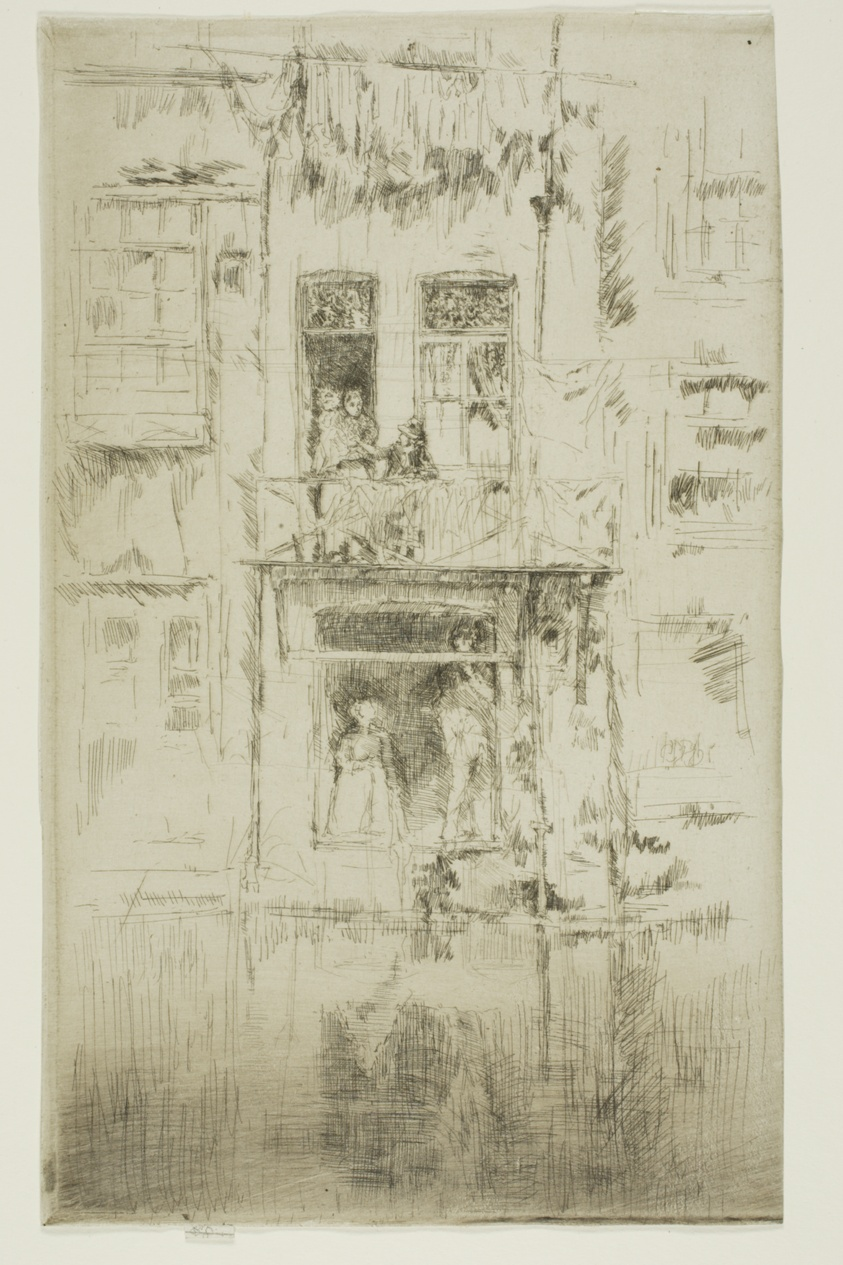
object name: Print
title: Balcony, Amsterdam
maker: James McNeill Whistler (American, 1834-1903)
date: 1889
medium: Etching and drypoint in black ink on ivory laid paper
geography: United States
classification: etching; drypoint; print; prints and drawing; paper